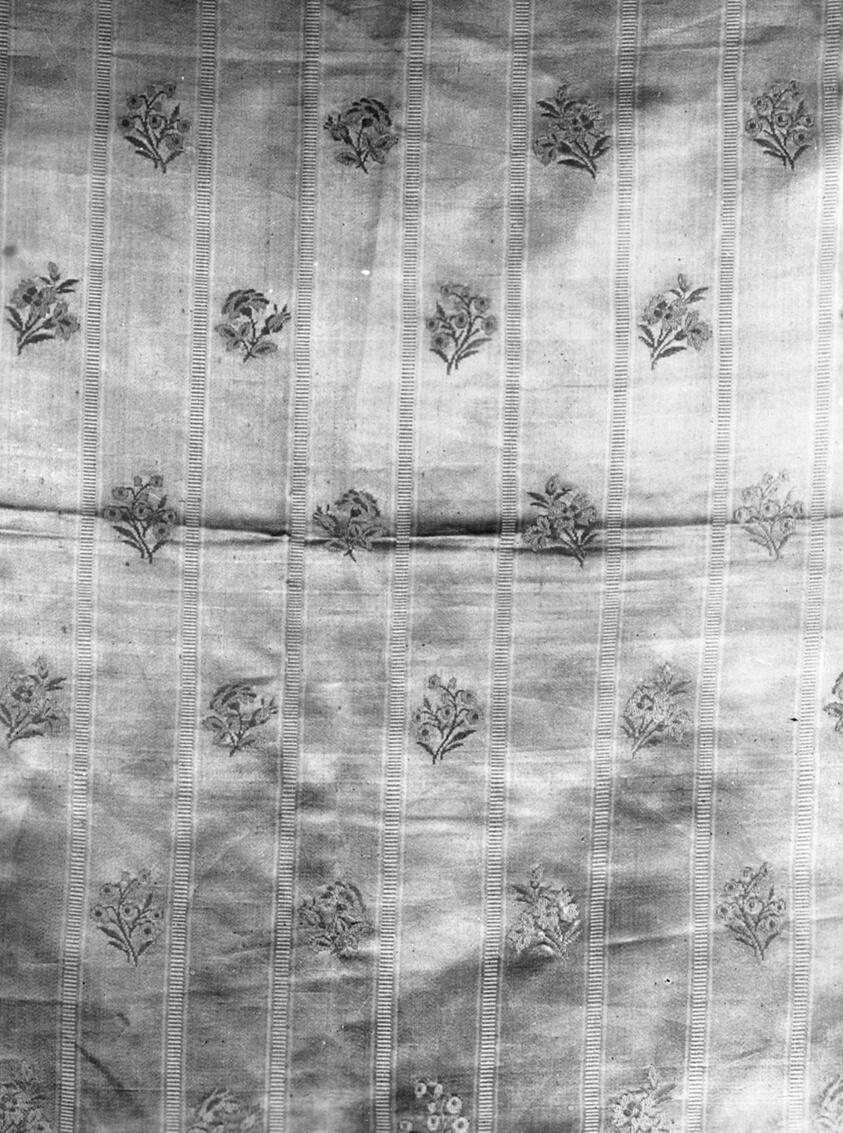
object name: Textile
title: Fragment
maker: France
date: Early 19th century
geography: France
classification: textile; weaving